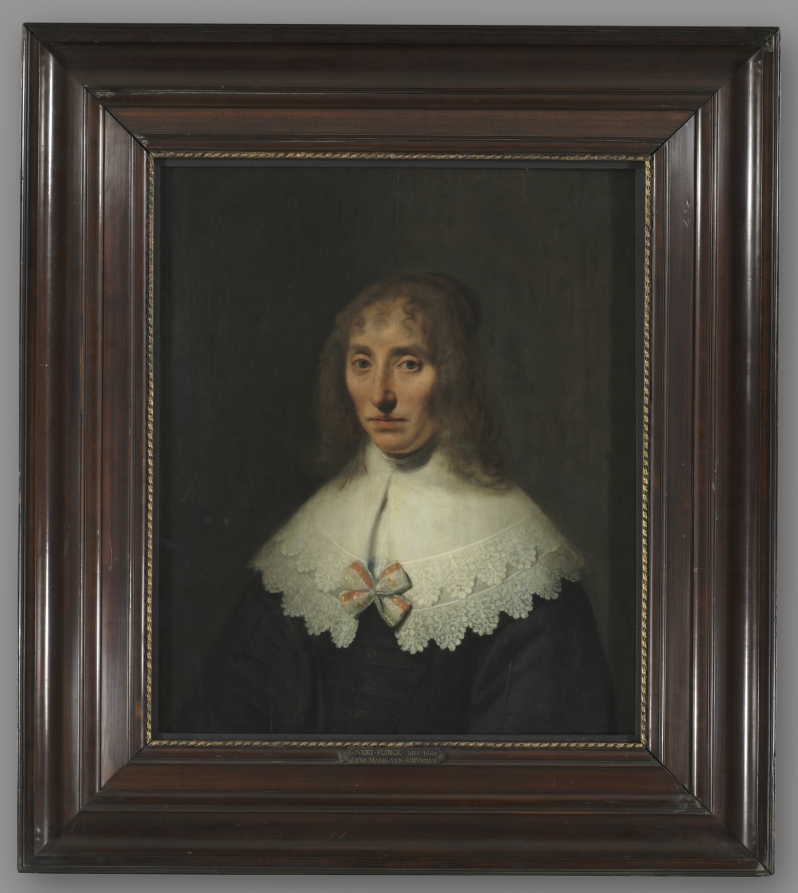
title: Portrait of a Woman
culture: Netherlands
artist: Govaert Flinck (Dutch, 1615–1660)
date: 1646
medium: oil on wood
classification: Painting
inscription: Signed left: "G. Flinck 1646"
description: Because of an inscription on the back, this painting was long considered a portrait of Anna Maria van Schurman, a prominent Dutch scholar and artist. These words, however, were added much later and incorrectly state that Anna Maria was 42 years old, when in reality she would have been 39. Furthermore, Flinck's likeness does not resemble other known portraits of this famous woman. Although her identity remains unknown, his sitter has an austere dignity and emotional complexity that captures her individuality through the careful description of her expression and dress. Due to this naturalism and elegant formality, Flinck achieved wealth and a high social standing throughout the 1640s as one of Amsterdam's most popular portraitists, rivaling his former master, Rembrandt. Joachim Sandrart, a contemporary German painter, once commented that compared to Rembrandt's portraits, Flinck's "were more felicitous in the exactness and in the pleasing quality of the portrayal."